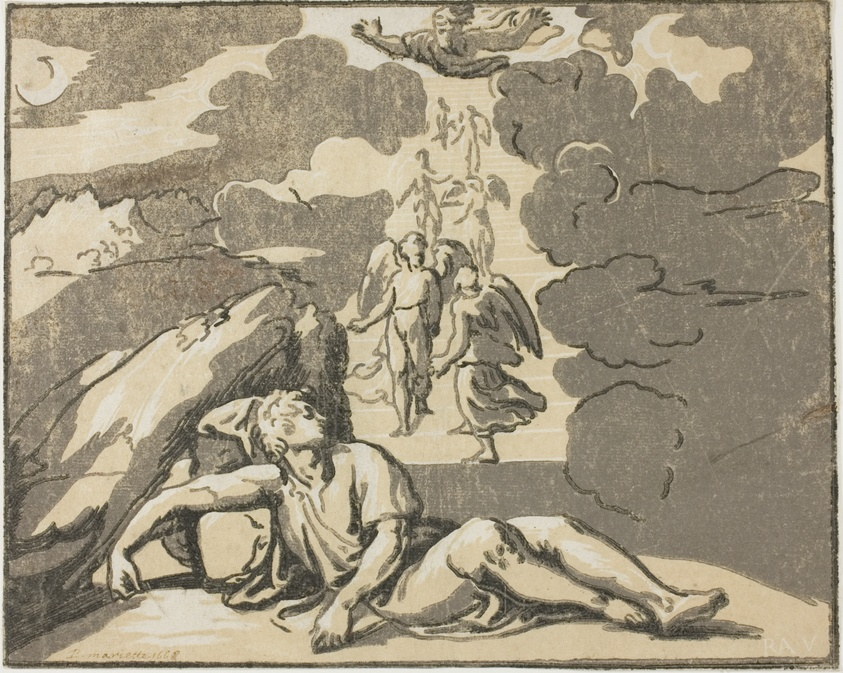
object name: Print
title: Jacob's Dream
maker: Niccolò Vicentino (Italian, active c. 1540-1550); after Raffaello Sanzio, called Raphael (Italian, 1483-1520)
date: mid 16th c.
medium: Chiaroscuro woodcut printed in tan, gray and black on ivory laid paper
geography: Italy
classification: woodcut; print; prints and drawing